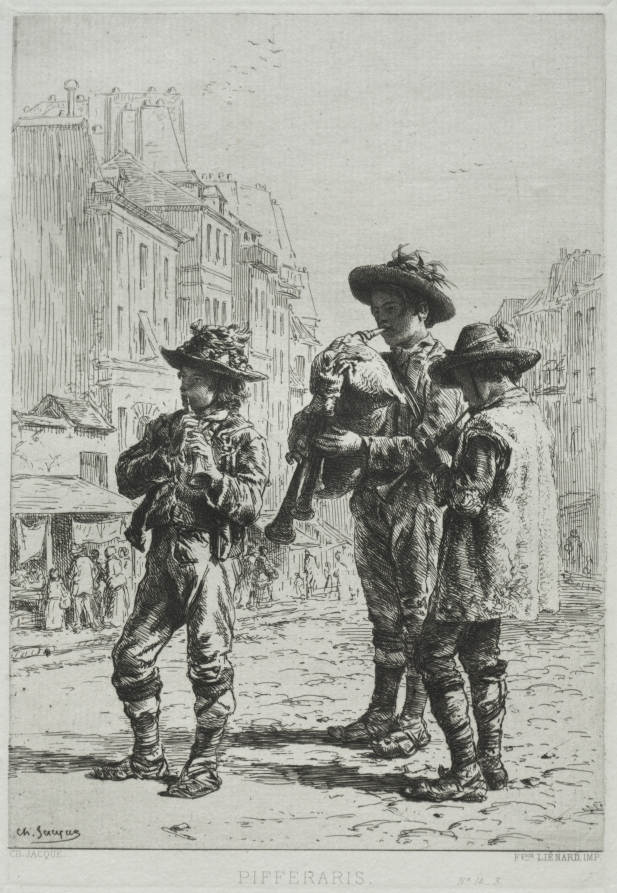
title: Pifferaris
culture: France, 19th century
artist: Charles-Émile Jacque (French, 1813–1894)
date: 1864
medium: etching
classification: Print